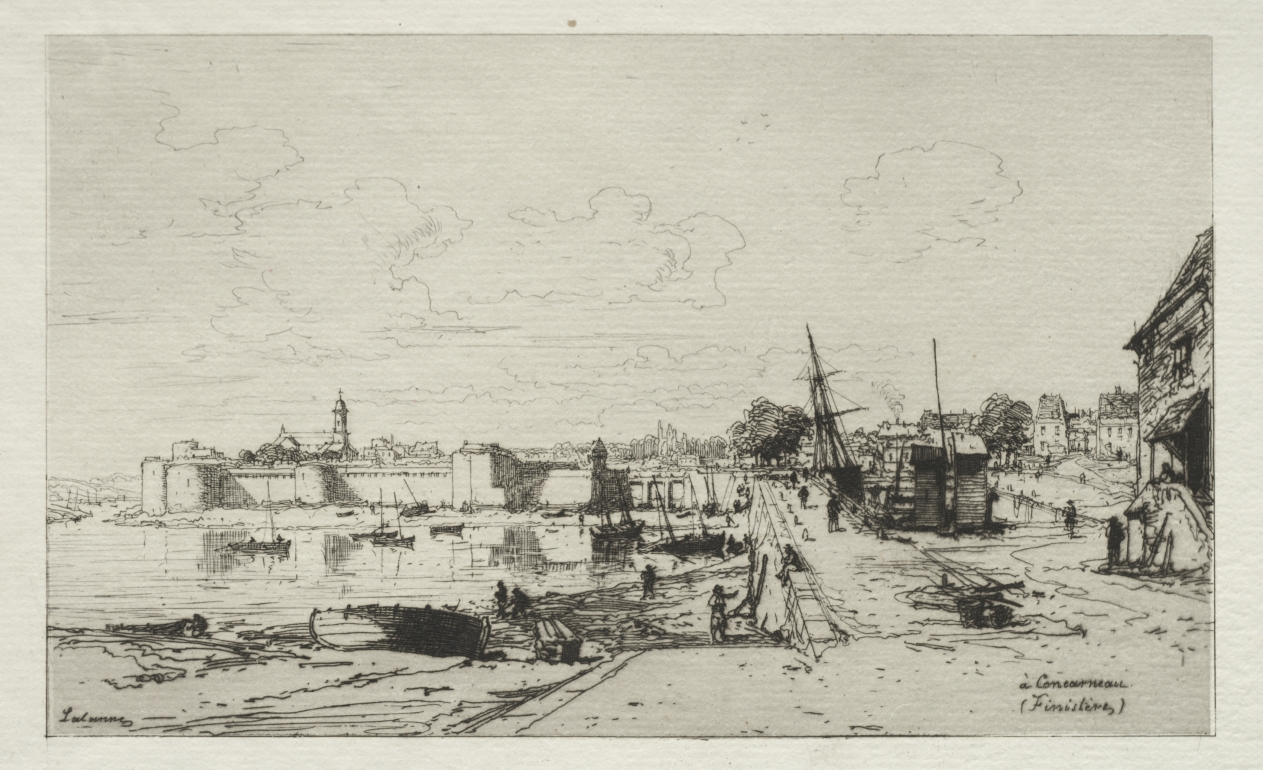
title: A Concarneau (Finistère)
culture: France, 19th century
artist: Maxime Lalanne (French, 1827–1886)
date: 1874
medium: etching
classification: Print